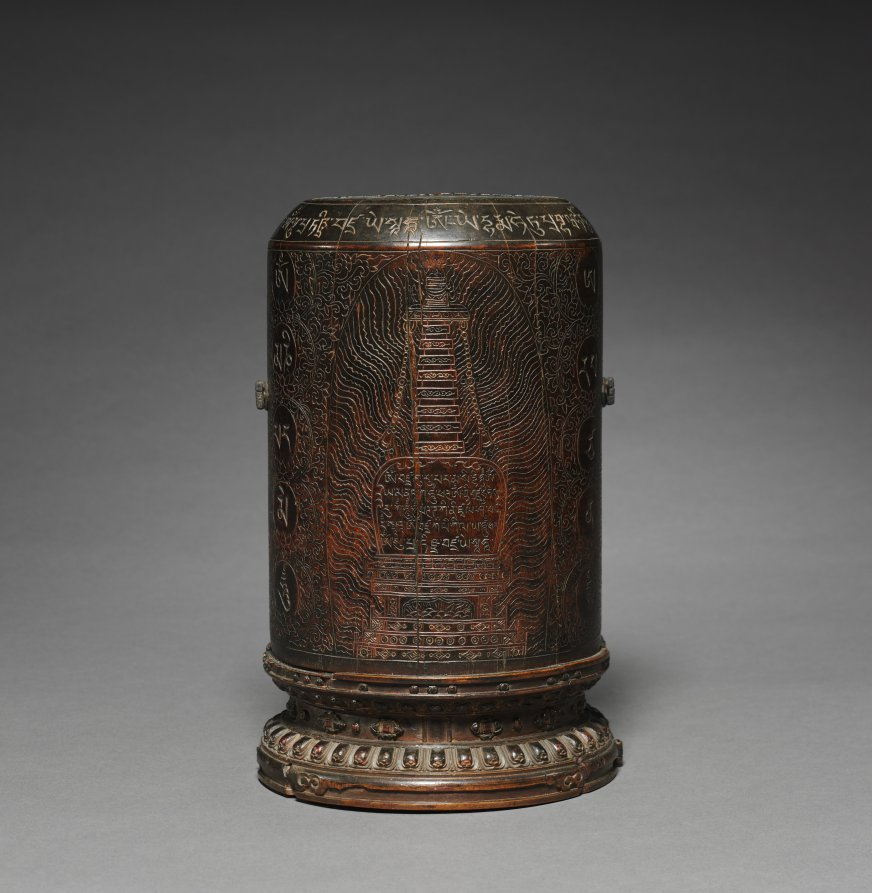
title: Portable Shrine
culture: Tibet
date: c. 1500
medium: wood with mineral pigments and metal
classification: Sculpture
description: Carved from a solid section of a log, the shrine contains images of protectors of tantric Buddhism—a branch that developed in northern India and became prominent in the Himalayas by the 700s. The central figure in the top row is Padmasambhava (Indian, active in Tibet in the 740s), venerated as the founder of one of the four main Tibetan monastic orders. Incised on the exterior are images of protectors, mantras written in Tibetan script, and a sacred funerary monument called a stupa. Tantric practice emphasizes recitation of mantras that invoke the powers of compassion, wisdom, and protection.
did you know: Tantric practice can be performed alone in any location; this shrine could be used by a traveling practitioner for meditation, visualization, prayer, and recitation of mantras.